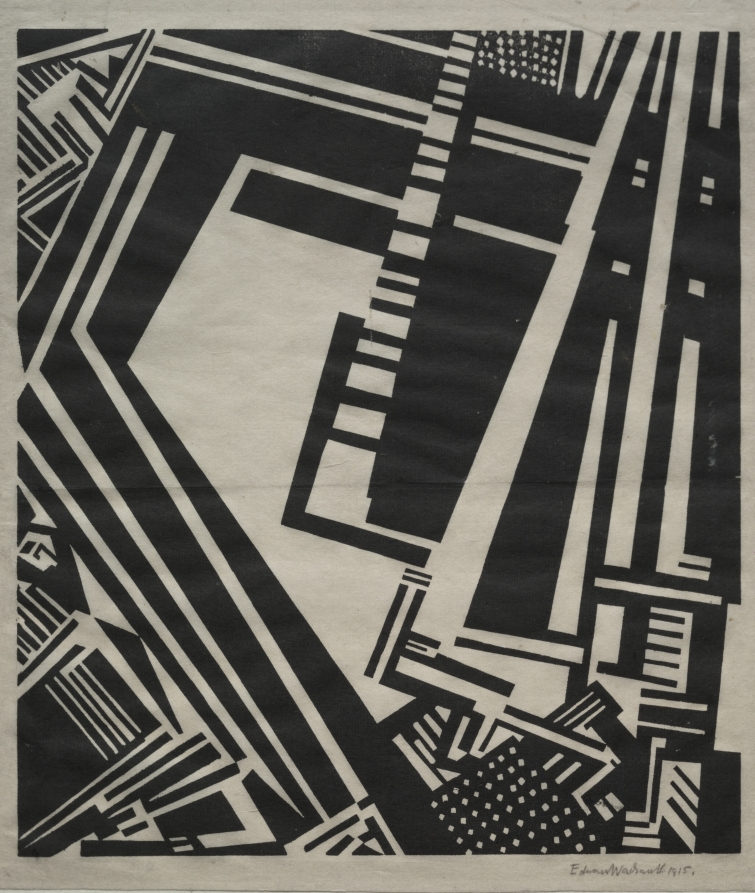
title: Illustration (Typhoon)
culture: England, 20th century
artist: Edward Alexander Wadsworth (British, 1889–1949)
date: 1914–1915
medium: woodcut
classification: Print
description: From 1913 to 1919, Wadsworth was an exponent of Vorticism, an avant-garde movement in England that, like a vortex or whirling force, drew all the most positive innovative elements of the time into an energetic synthesis. This group of artists, which also included Windham Lewis, David Bomberg, and Christopher Nevinson, developed geometric styles that merged the spatial analysis of Cubism with the preoccupation with dynamic urban motifs and industrial landscapes celebrated by the Italian Futurists. The description of a ship's engine room in Joseph Conrad's novel Typhoon was the motivation for Illustration. The topic was a natural choice for Wadsworth, who was interested in both machinery and the sea.